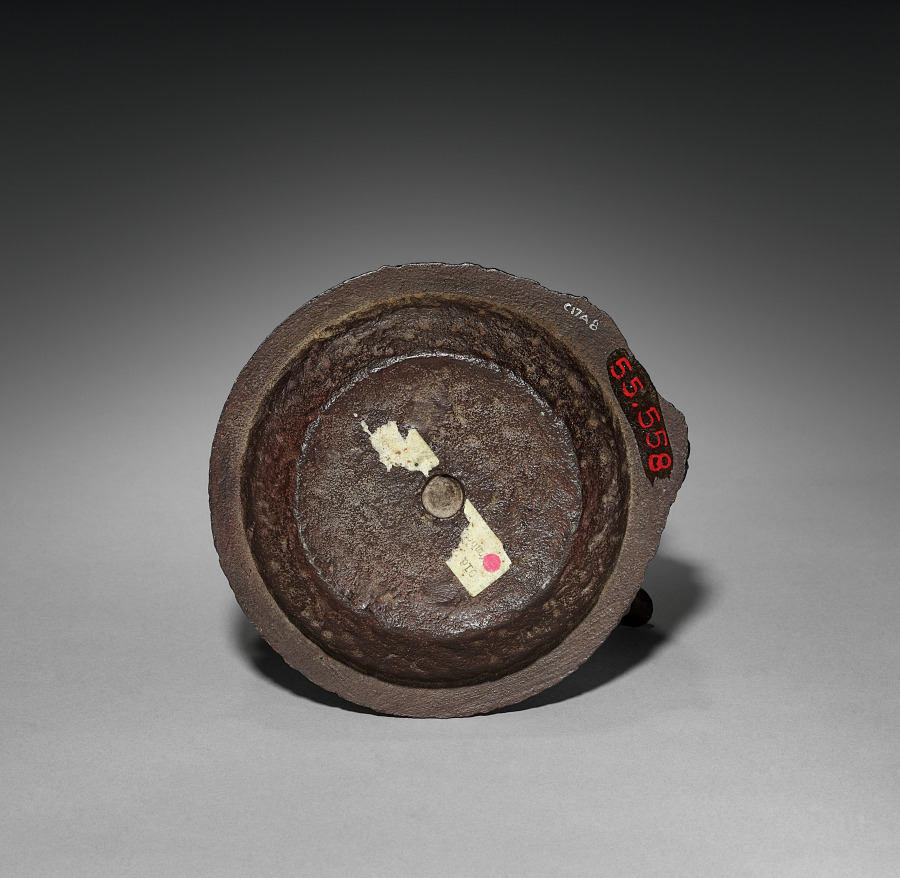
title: Covered Tea Kettle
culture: Japan, Edo period (1615–1868)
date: 1615–1868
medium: iron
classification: Metalwork